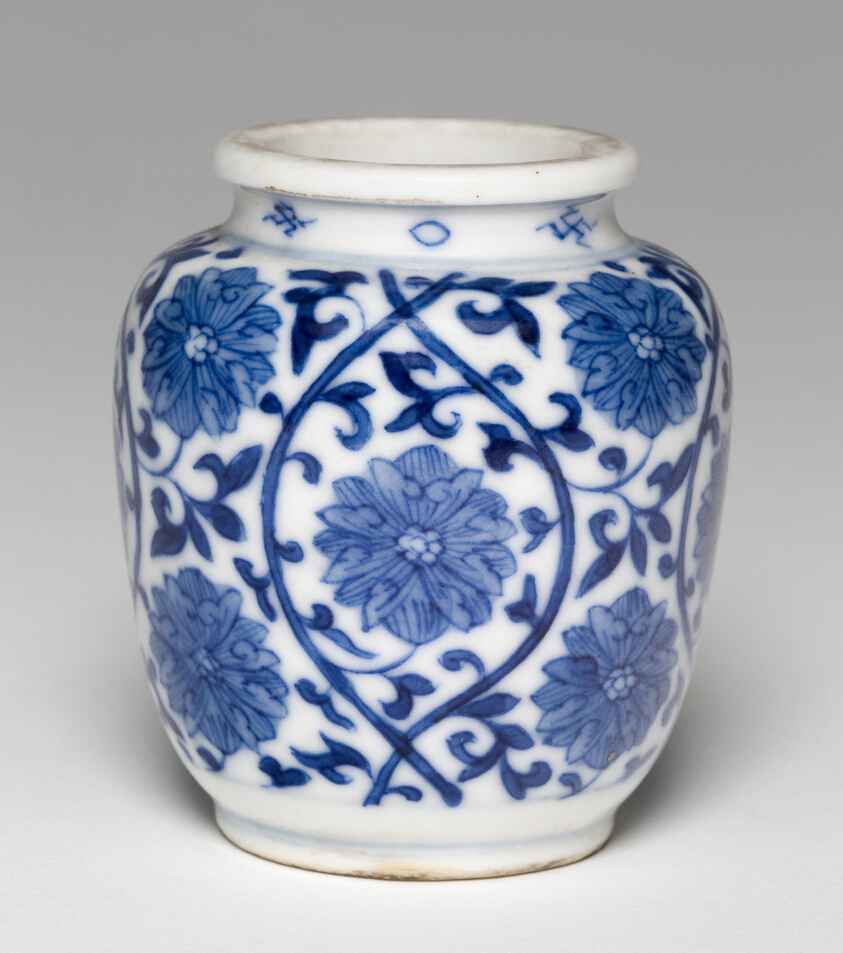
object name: Vessel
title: Jar with Peony Flowers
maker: China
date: Qing dynasty (1644–1911), Yongzheng period (1722–1735)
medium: Stoneware painted in underglaze blue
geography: China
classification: ceramics; asian art